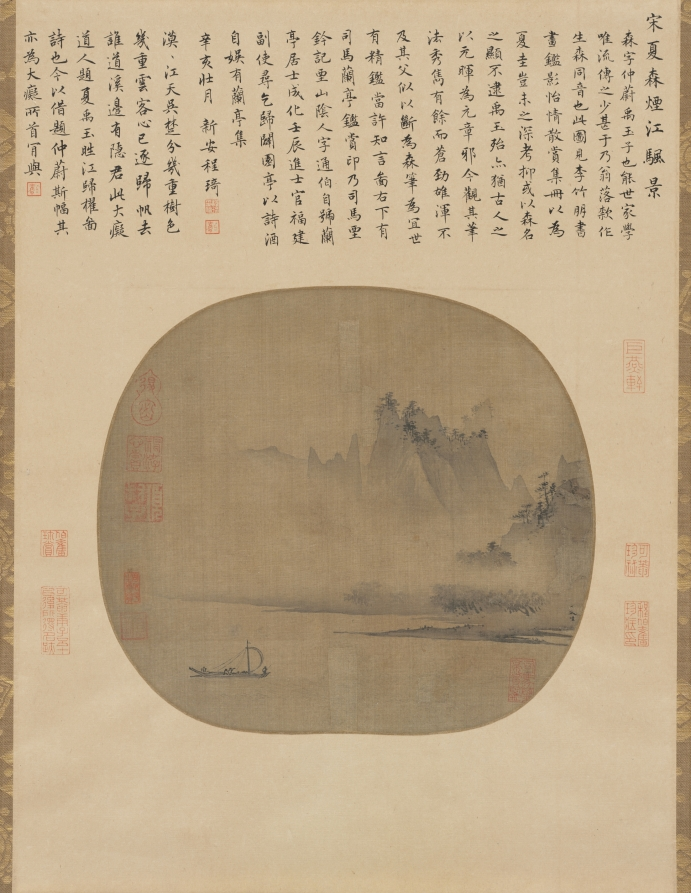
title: Full Sail on the Misty River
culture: China, Southern Song dynasty (1127-1279)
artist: assisted by Xia Sheng (Chinese, active 1200s)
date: 1200s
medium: Fan painting; ink on silk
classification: Painting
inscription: Artist's signature: Xia Sheng 夏生